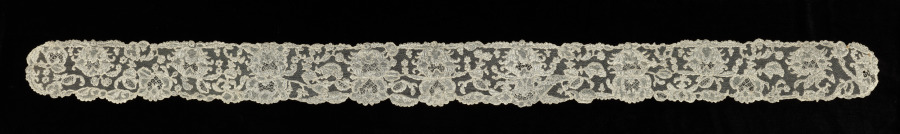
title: Lace Lappet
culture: Italy, Burano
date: 1700–1740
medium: Silk: needle lace (Burano Point)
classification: Lace